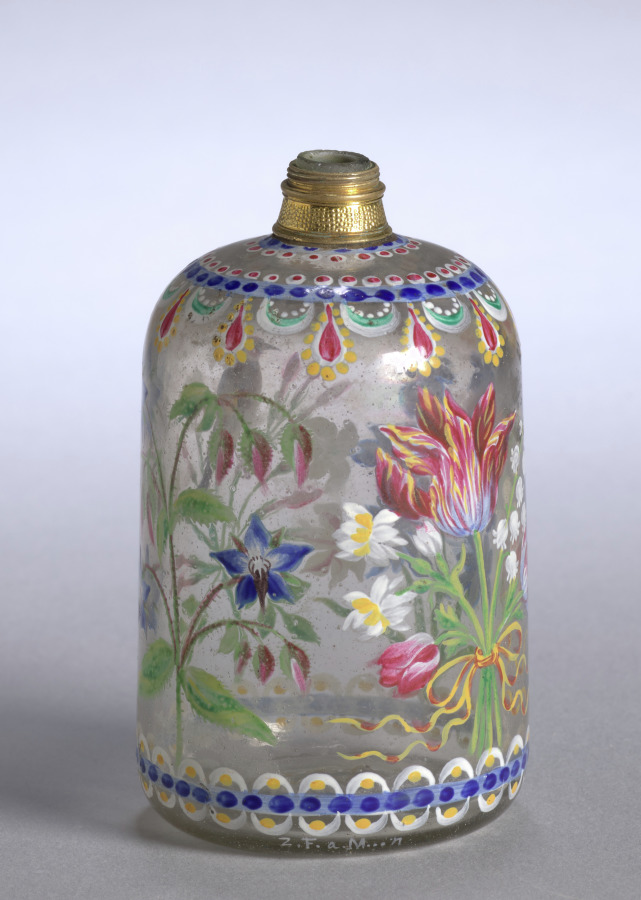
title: Scent Bottle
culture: Germany, 18th century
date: 1700s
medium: glass with enamel decoration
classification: Miscellaneous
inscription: signed: Z. F. a M.